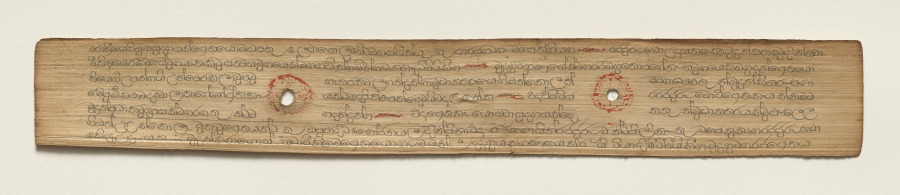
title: Leaf from a Buddhist Manuscript (verso)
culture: Sri Lanka, Singhalese, Late 17th century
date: c. 1700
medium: fiber paper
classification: Manuscript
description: Palm leaf material is still used for manuscripts in Sri Lanka. The palm leaves are prepared first by boiling them, drying them in the sun, and then rubbing them with oils. Scribes then use a metal stylus to incise the text. Then charcoal powder is wiped across the pages, filling in only the inscribed lines.